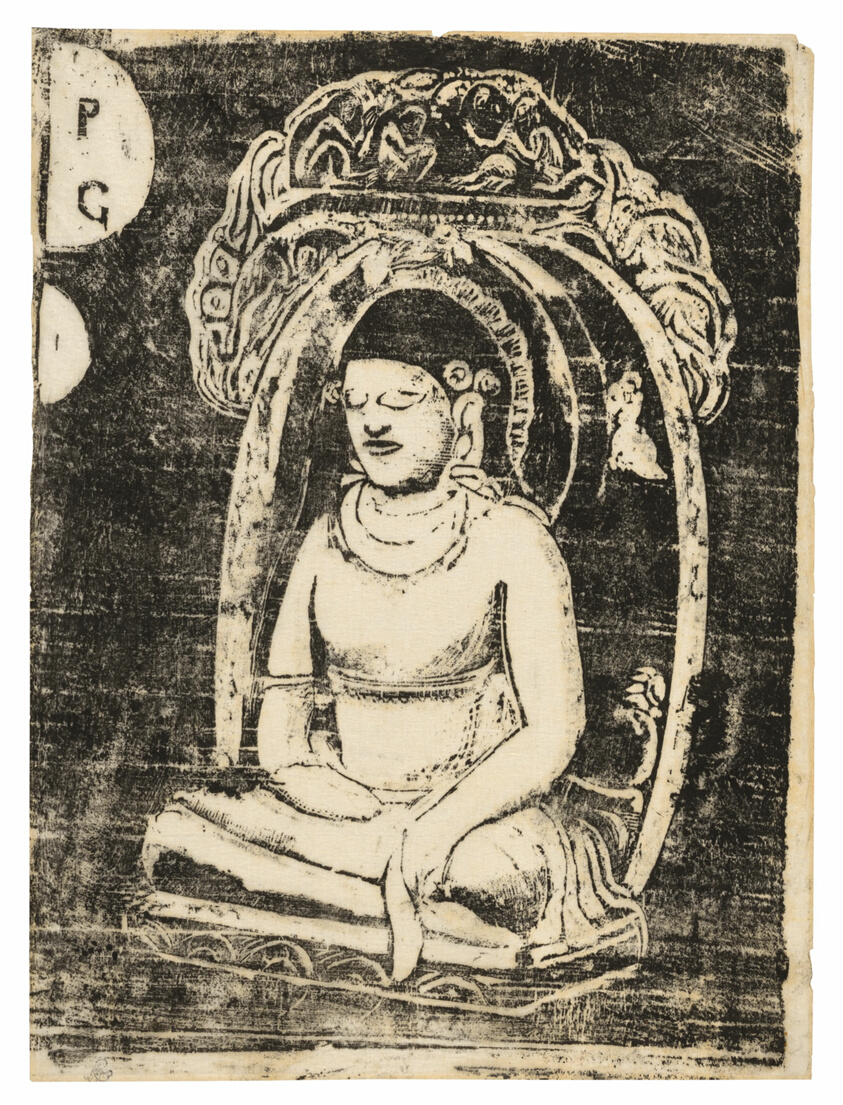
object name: Print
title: Buddha, from the Suite of Late Wood-Block Prints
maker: Paul Gauguin (French, 1848-1903)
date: 1898/99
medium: Wood-block print in black ink on thin ivory Japanese paper perimeter mounted on white Japanese paper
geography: France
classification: woodcut; print; prints and drawing